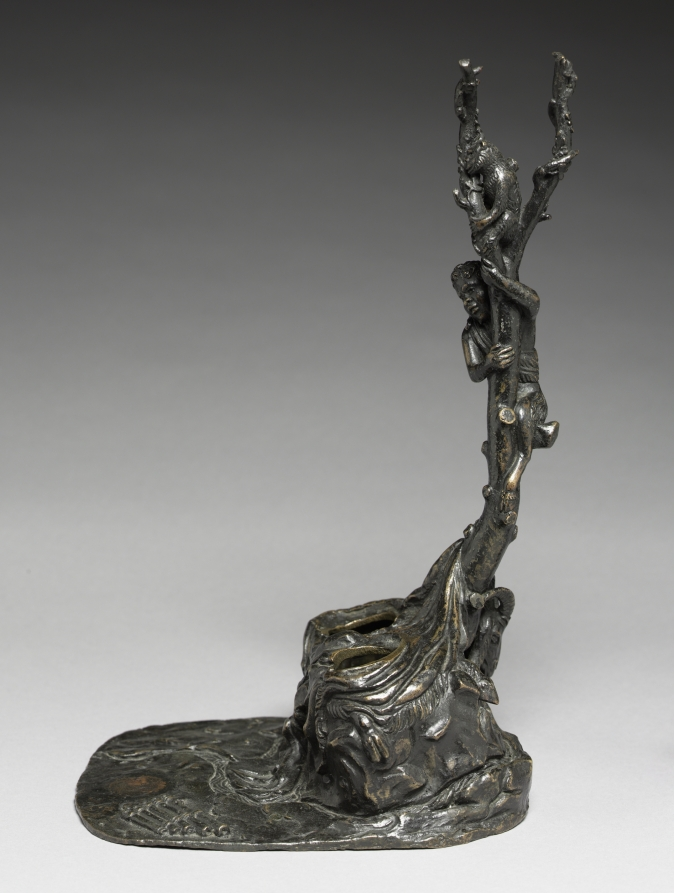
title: Base for a Satyr and Satyress Group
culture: Italy, possibly Padua, early 16th century or later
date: early 1500s or later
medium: bronze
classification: Sculpture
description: The pagan subject matter here was common in the 1500s and, with the pan pipes on the ground, indicates a scene of poetry and music. Long thought to be an ink stand, the two openings are now understood as possibly having housed a satyr and satyress.